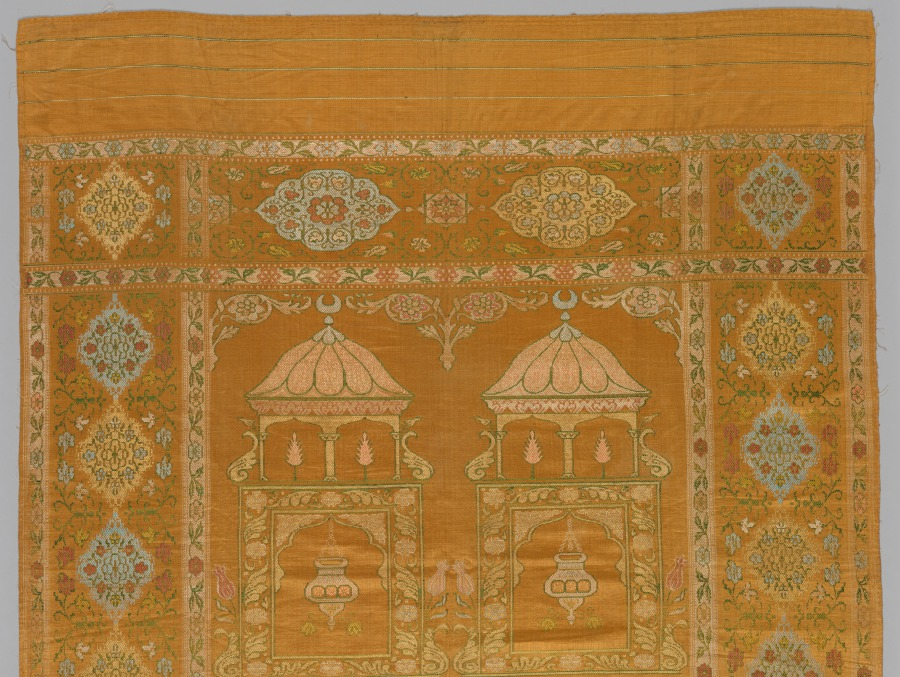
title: Coverlet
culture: Turkey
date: 1800s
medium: silk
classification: Textile